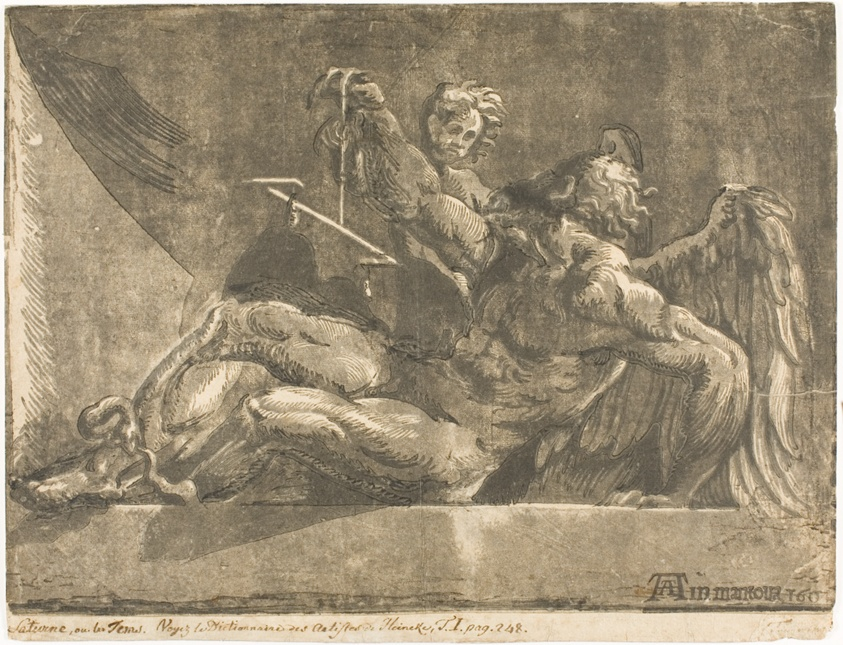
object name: Print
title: Saturn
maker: Niccolò Vicentino (Italian, active c. 1540-1550); after Giovanni Antonio de' Sacchis, called Il Pordenone (Italian, c. 1483-1539); printed by Andrea Andreani (Italian, c. 1558/9-1629)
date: c. 1540-50, published in 1604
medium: Chiaroscuro woodcut, printed from four blocks, in four shades of gray, on white laid paper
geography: Italy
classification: chiaroscuro woodcut; woodcut; print; prints and drawing